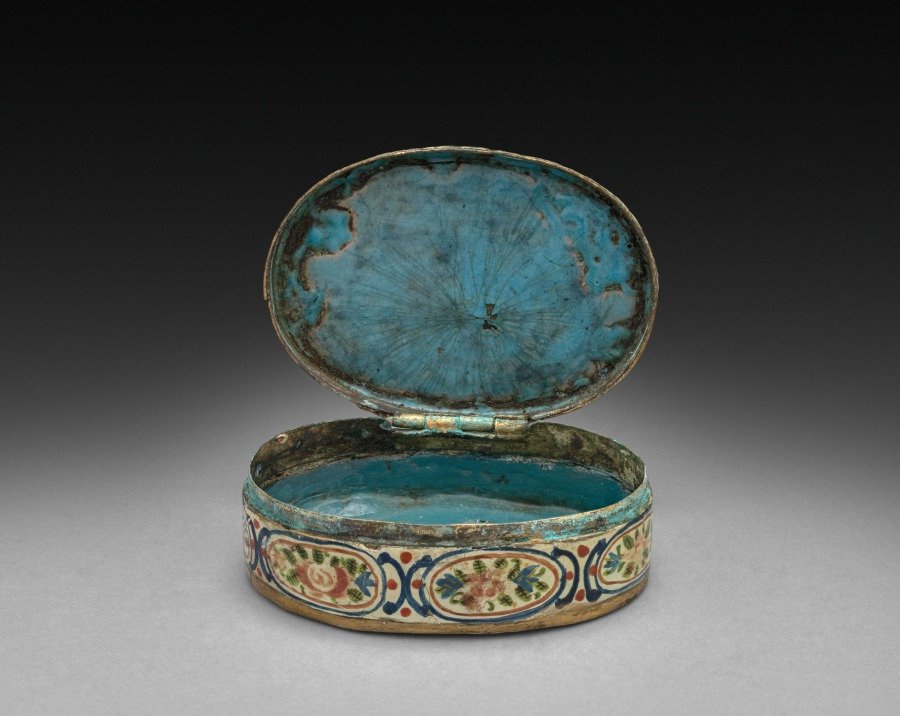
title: Box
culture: China, Qing dynasty (1644-1911) or Republican period (1912-49)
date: 1900–1916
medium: enamel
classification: Enamel